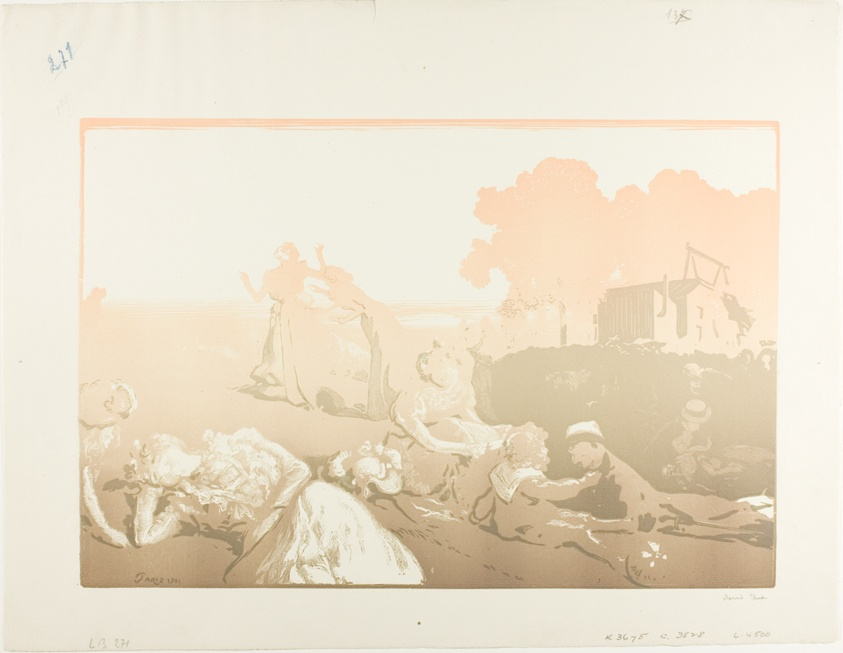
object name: Print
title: Modern Bucolic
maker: Louis Auguste Lepère (French, 1849-1918); commissioned by and final state published by Graphischen Künste (Austrian, active 19th-20th centuries)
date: 1901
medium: Woodcut in olive-brown, brown/tan, salmon and peach from two blocks on cream laid paper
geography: France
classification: woodcut; print; prints and drawing